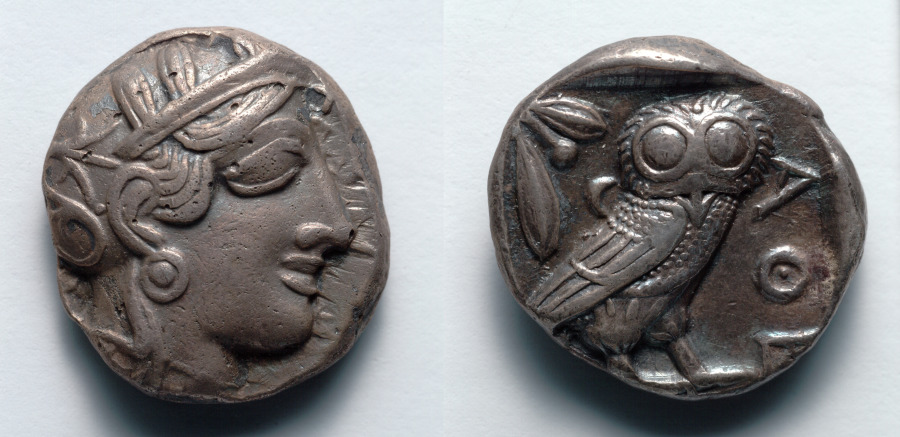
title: Tetradrachm: Head of Athena (obverse); Owl (reverse)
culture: Greek, minted at Athens (Attica)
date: 480–449 BCE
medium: silver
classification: Coins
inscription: ΑΘΕ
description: Incorporating the first three letters of the city name—ΑΘΕ—with then-iconic images of the patron goddess Athena and her owl, the Athenian tetradrachm was among the most widely traded and most recognizable coins of the ancient world. The olive leaves on Athena’s helmet and the small crescent moon behind the owl date this coin after the Persian Wars.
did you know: The three letters on the reverse—ΑΘΕ—mark this as an Athenian coin.